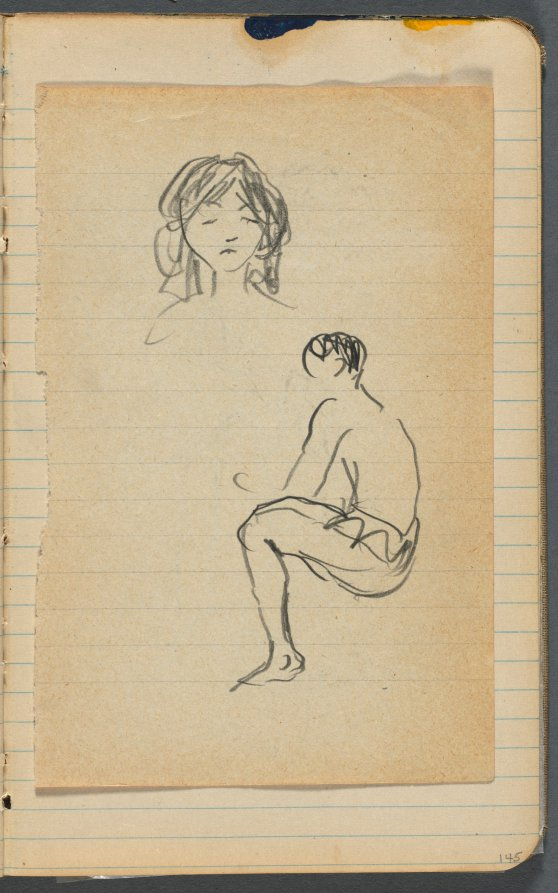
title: Sketchbook, loose shet between pgs. 144 & 145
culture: America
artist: Maurice Prendergast (American, born Newfoundland [now Canada], 1858–1924)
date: 1905–10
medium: graphite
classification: Bound Volume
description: This sketchbook contains 69 pages of drawings, a diary largely devoted to the state of the artist's health, and a three-page discourse on the nature of genius and ideas.